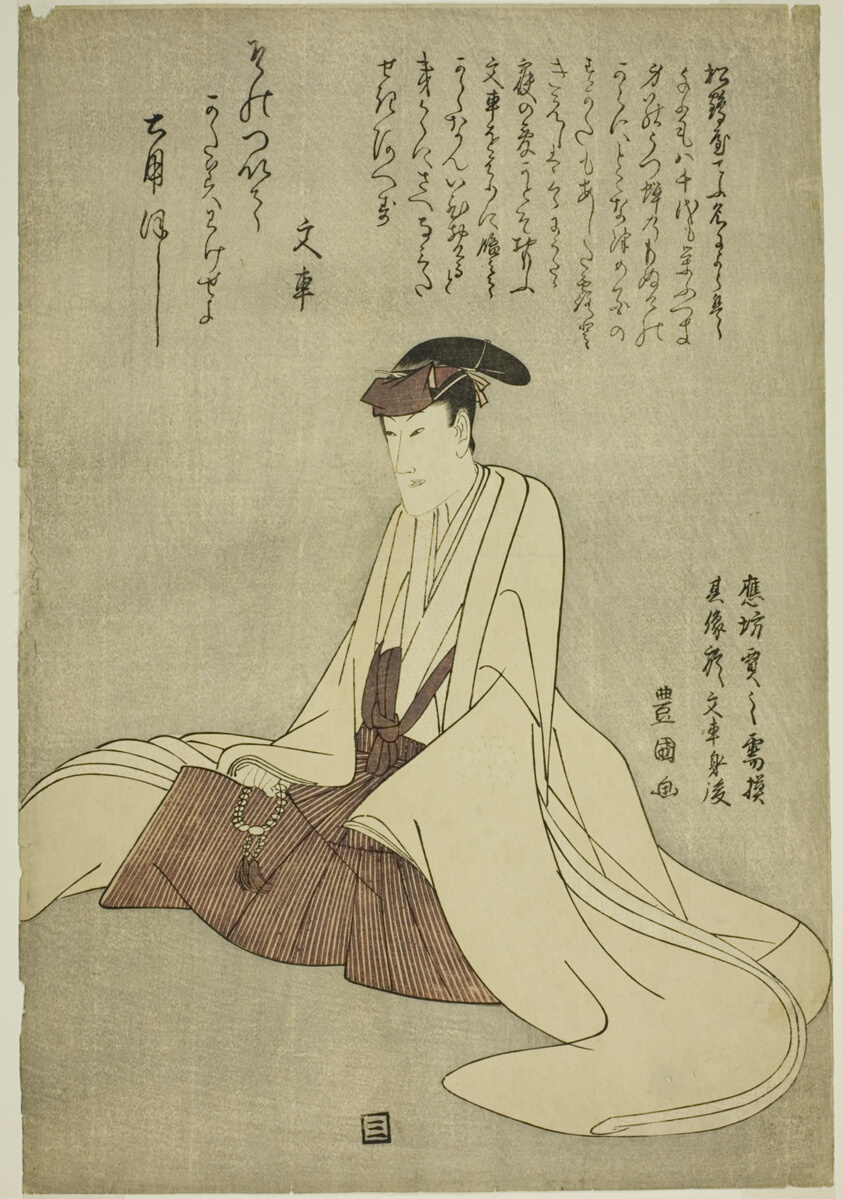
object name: Print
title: Memorial portrait of the actor Matsumoto Yonesaburo I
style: Japanese (culture or style)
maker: Utagawa Toyokuni I 初代 歌川 豊国; Japanese, 1769–1825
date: 1805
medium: Color woodblock print; oban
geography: Japan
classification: woodblock print; print; asian art